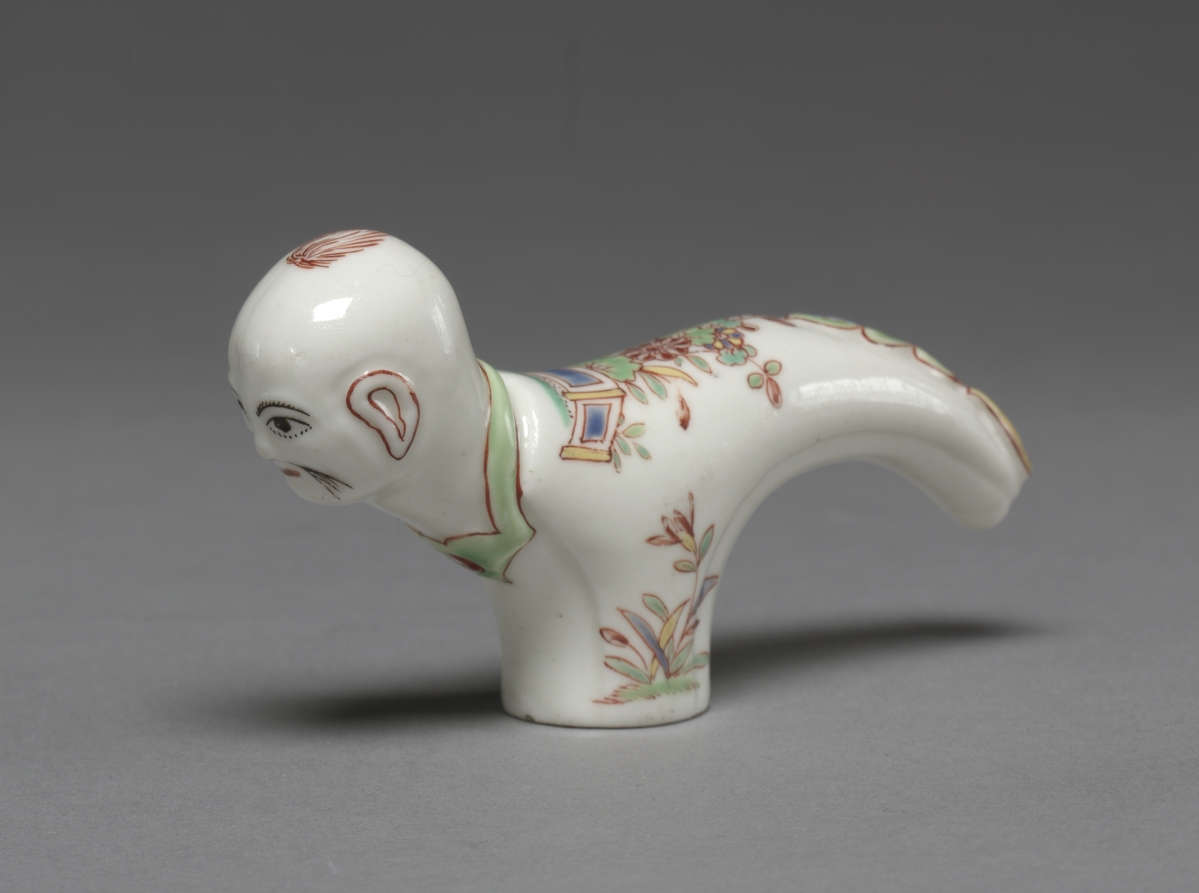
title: Cane Handle (Poignée de canne)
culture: France, Saint Cloud, 18th century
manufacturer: Saint Cloud Porcelain Factory (French)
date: c. 1745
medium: soft-paste porcelain with enamel decoration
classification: Ceramic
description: During the first half of the 18th century, porcelain cane handles were widely produced by the Saint-Cloud porcelain factory. This cane handle, molded in the shape of the head and torso of an Asian man, is representative of the popularity of chinoiserie, European designs that attempted to imitate the art, culture, and techniques of China and Japan.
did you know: The colorful overglaze enamel that decorates this cane handle was typical of Japanese Kakiemon decoration.